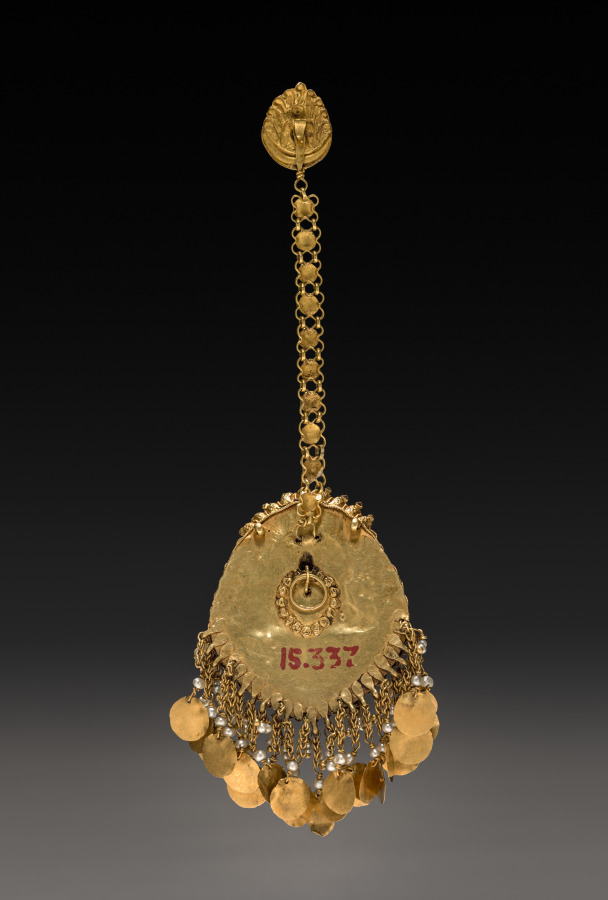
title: Forehead Pendant with Sun God Surya in a Chariot with Attendants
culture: Nepal, Kathmandu Valley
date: 1600s or 1700s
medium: gold set with jewels and semi-precious stones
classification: Jewelry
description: This pendant was made to hang on a sculpture of a deity under worship in a Nepalese temple. The image of the Sun God, venerated by both Buddhists and Hindus, is carved in translucent golden stones set into a framework of gold wire.He holds two lotuses with emeralds in the center.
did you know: The golden figure below the Sun God is the Dawn, driving the five-horse chariot across the sky.